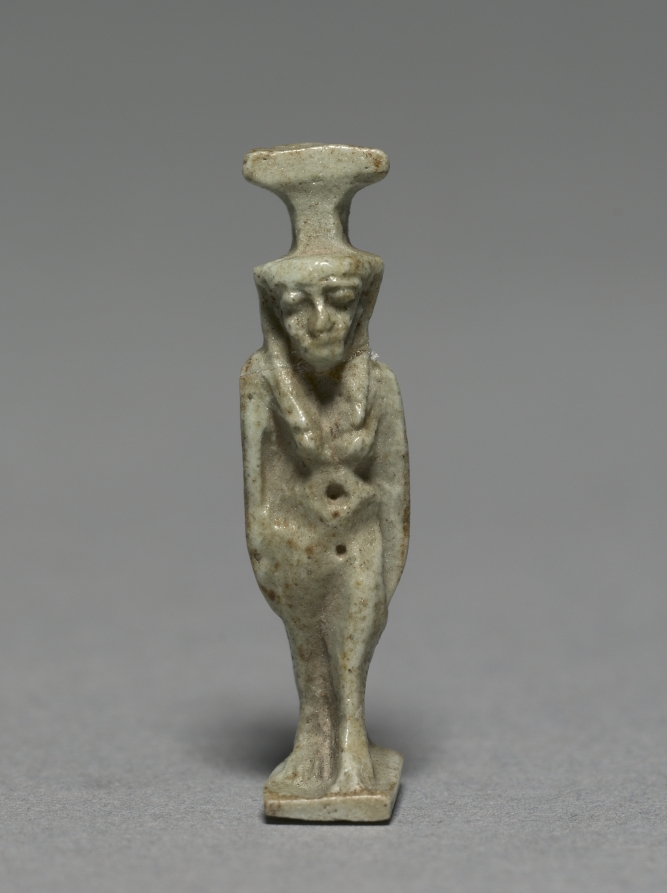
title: Amulet of Nephthys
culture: Egypt, Late period (715–332 BCE), Dynasty 30–Greco-Roman period (332 BCE–395 CE), Ptolemaic dynasty (305–30 BCE)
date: 380–30 BCE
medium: gray green faience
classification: Amulets